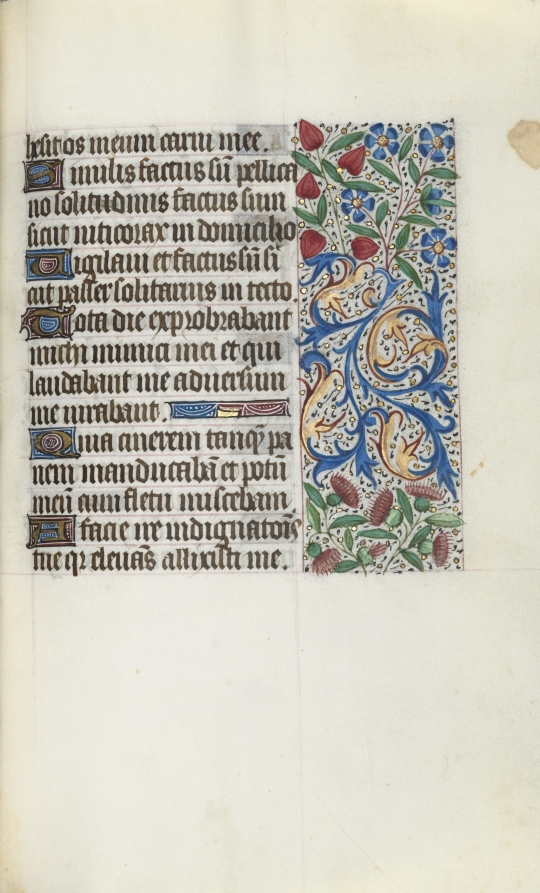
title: Book of Hours (Use of Rouen): fol. 88r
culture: France, Rouen, 15th century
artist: Master of the Geneva Latini (French, active Rouen, 1460–80)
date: c. 1470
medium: ink, tempera, and gold on vellum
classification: Bound Volume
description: In the late 1400s and early 1500s Rouen was an established and important center of book production. The city’s cathedral had a wealthy chapter that spent large sums of money to commission books and to maintain its extensive library. The stationers and booksellers would have likely been concentrated in or near the cathedral precinct. This artist, named after a manuscript now in Geneva, was Rouen’s principal illuminator during the second half of the 1400s.